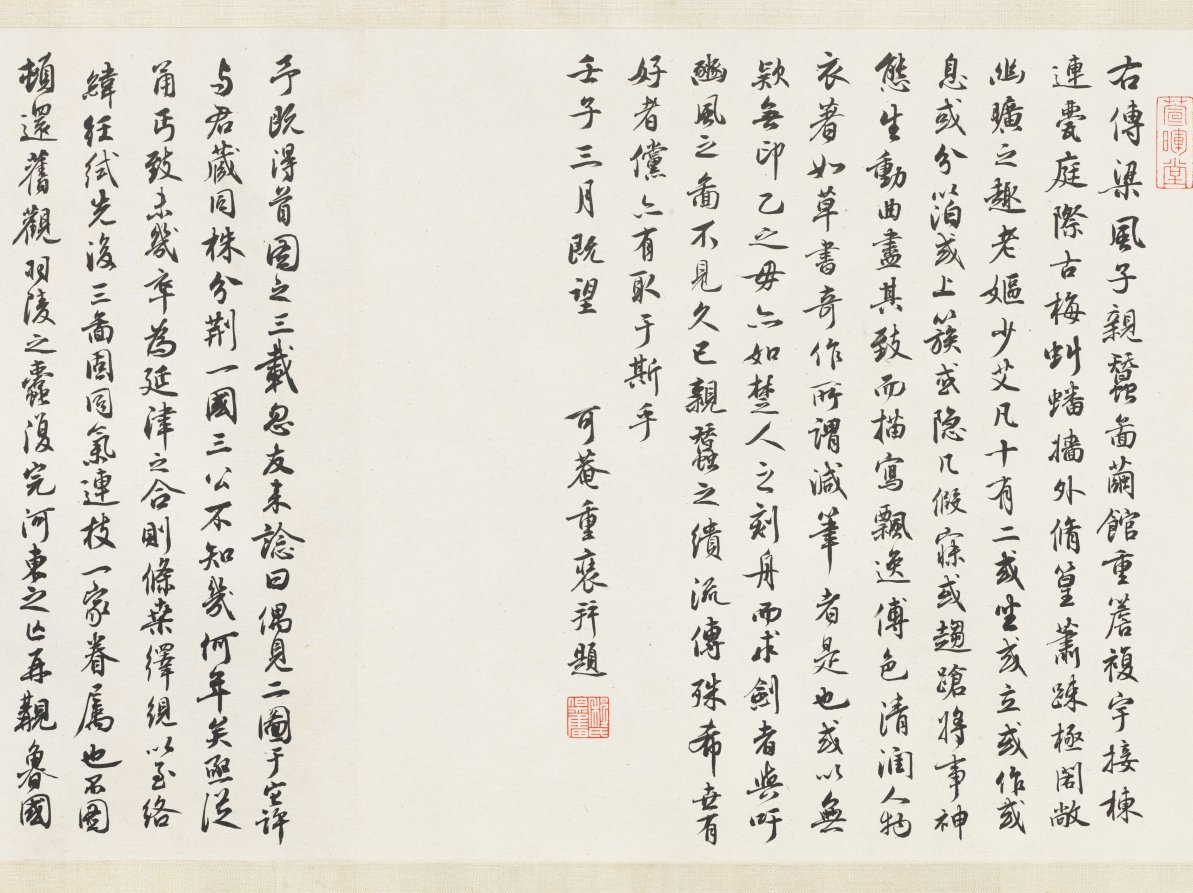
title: Sericulture (The Process of Making Silk)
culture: China, Southern Song dynasty (1127-1279)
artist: attributed to Liang Kai (Chinese, mid-1100s–early 1200s)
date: early 1200s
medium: Handscroll; ink and color on silk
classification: Painting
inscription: 3 colophons and 7 seals of Ch'eng Ch'i (20th c.).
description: By the Southern Song period, the economic center of the silk industry had shifted to the lower Yangzi delta, while the north continued to be troubled by wars. Divided into three sections, the handscroll illustrates 14 steps in the process of making silk, from the raising of silkworms to the weaving of silk cloth. The scroll’s scenes follow the illustrations of Lou Shou’s (1090–1162) Pictures of Tilling and Weaving (gengzhi tu), the first recorded painting of this genre, which was conceived in Hangzhou around 1145. However, in the Cleveland painting the artist groups several scenes of sericulture together under the roof of an open structure.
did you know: The painting is attributed to Liang Kai, a court artist active from about 1201 to 1204 at the Imperial Painting Academy in the city of Hangzhou, a major silk weaving center from that time to the present day.